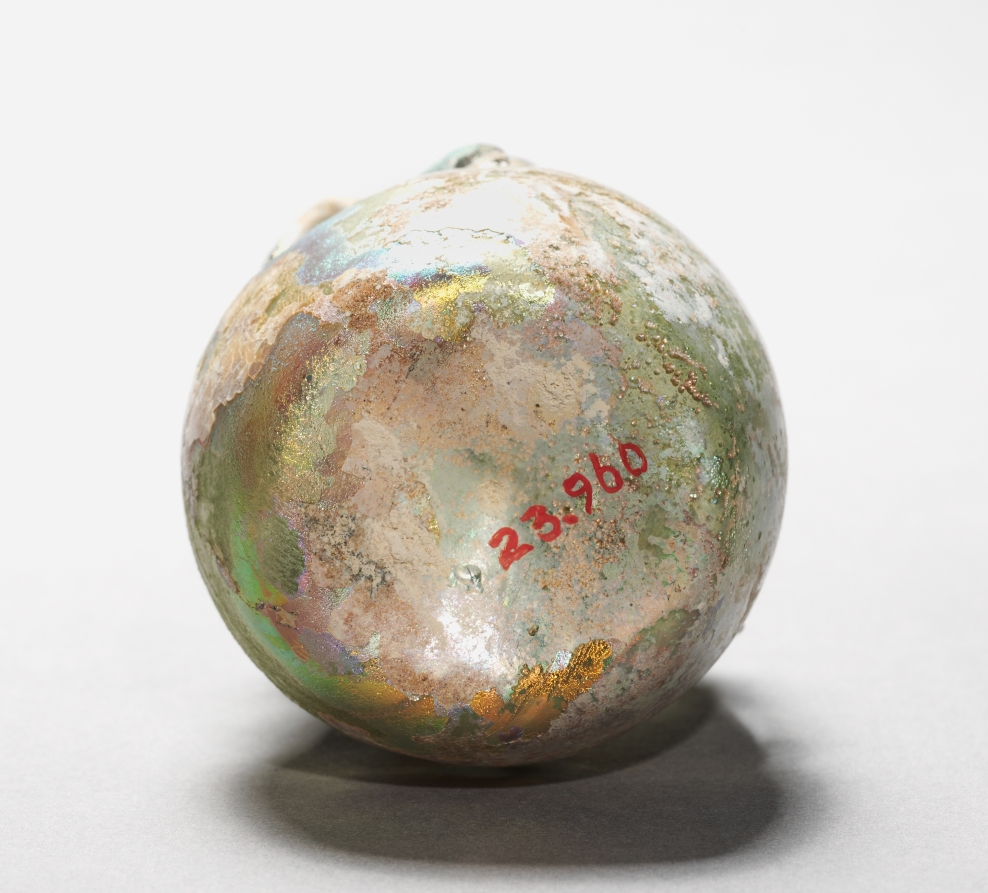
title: Vase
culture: Italy, Roman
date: 100–300 CE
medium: glass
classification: Glass